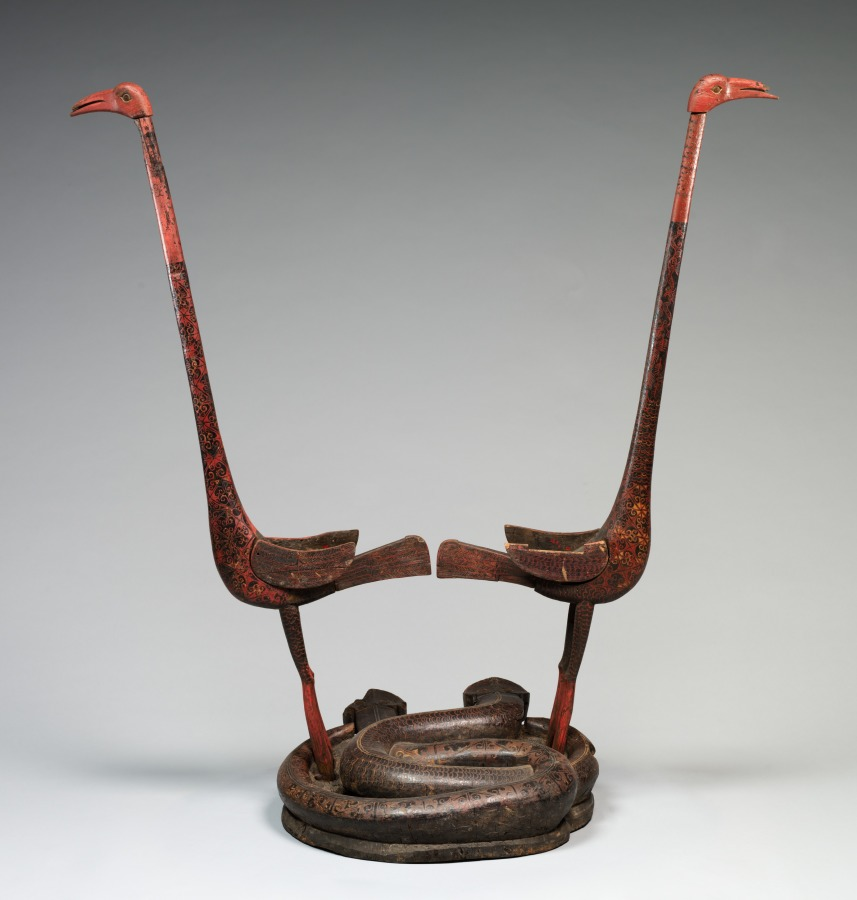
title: Cranes and Serpents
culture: China, reportedly from Hunan province, Changsha, Warring States period (475–221 BCE), State of Chu (c. 1046–223 BCE)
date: 475–221 BCE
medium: lacquered wood with polychromy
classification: Sculpture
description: A different style of ritual art developed in the state of Chu in South China. In addition to bronze vessels, lacquered wood artifacts expanded the repertory of ritual implements. This extraordinary sculpture was probably a drum stand for supporting a suspended drum in ritual ceremonies. It is unique among other excavated drum stands of the Chu, which typically show two birds standing on tigers. The theme of the bird stepping on the serpent was common in the Chu visual culture. Yet the slender proportions and seemingly flimsy structure of this particular set raise the question of whether it was utilitarian or mostly served symbolic functions in the tomb. The birds' and serpents' bodies have designs painted in red lacquer and yellow pigment against the black lacquer. Scientific analyses confirm the additional use of a blue or green pigment that has been discolored over time.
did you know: The cranes' long necks allowed a lightweight drum to be suspended from strings through the beaks, while the densely intertwined snakes provided a weighty base to stabilize the object during musical performances.